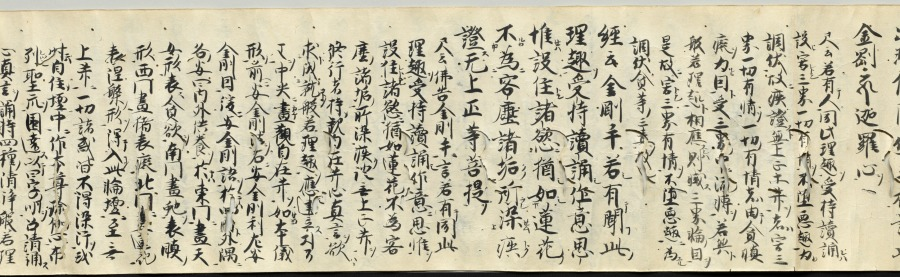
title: Scroll of Miscellaneous Notes written on a Calendar by Priest Seigen (recto)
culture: Japan, Kamakura period (1185–1333)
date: c. 1200–1231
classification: Manuscript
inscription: bears miscellaneous notes written by Priest Seigen.